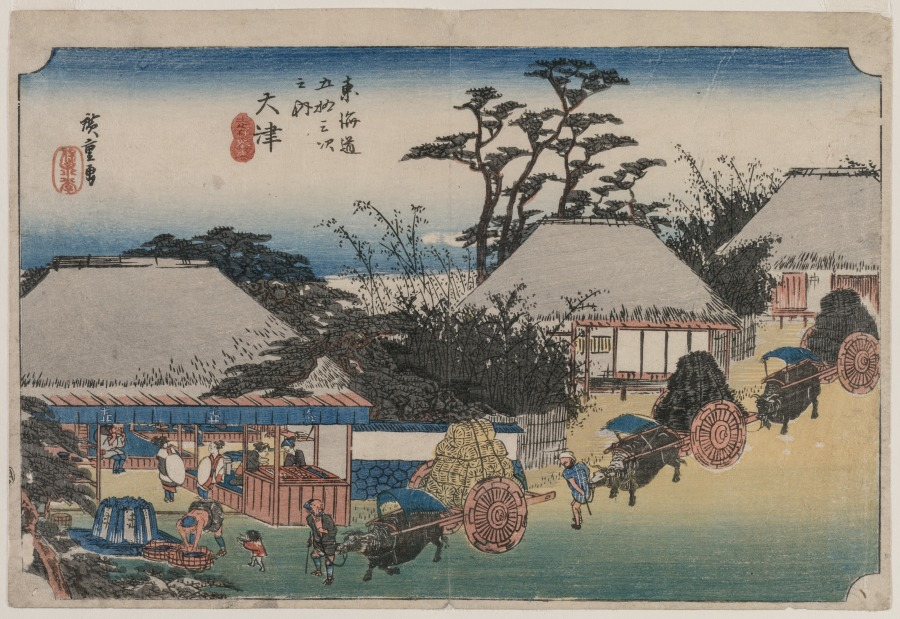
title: The Fifty-Three Stations of the Tokaido: Otsu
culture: Japan, Edo period (1615–1868)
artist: Utagawa Hiroshige (Japanese, 1797–1858)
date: 1833–1834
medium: color woodblock print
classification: Print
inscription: Publisher: Hoeido